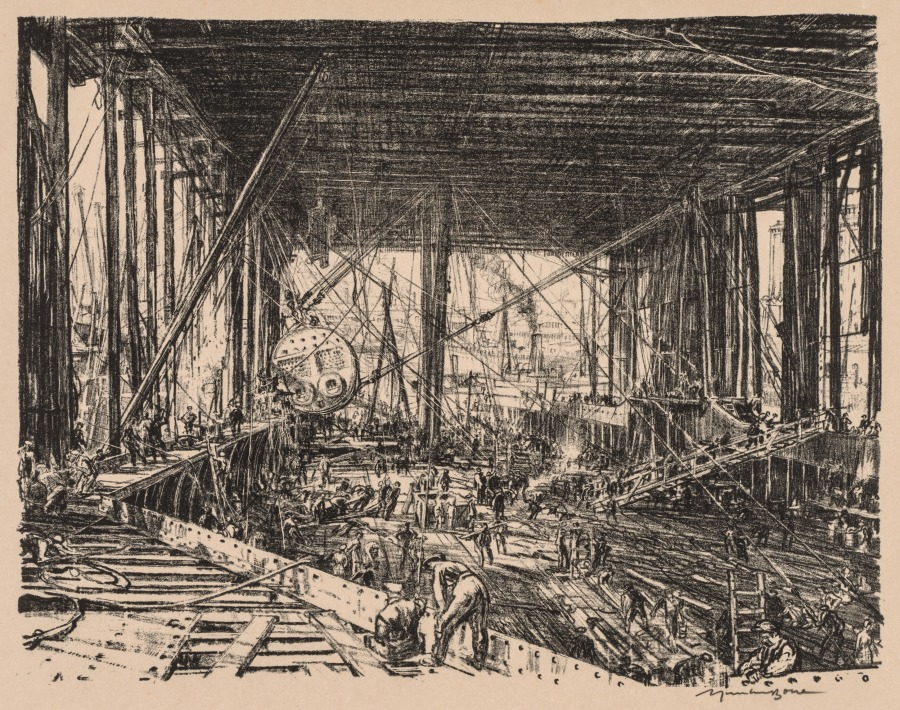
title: On the Clyde, 1917-1918: The Floor of the Train Ferry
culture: England, 20th century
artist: Muirhead Bone (British, 1876–1953)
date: 1917–1918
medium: lithograph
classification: Print